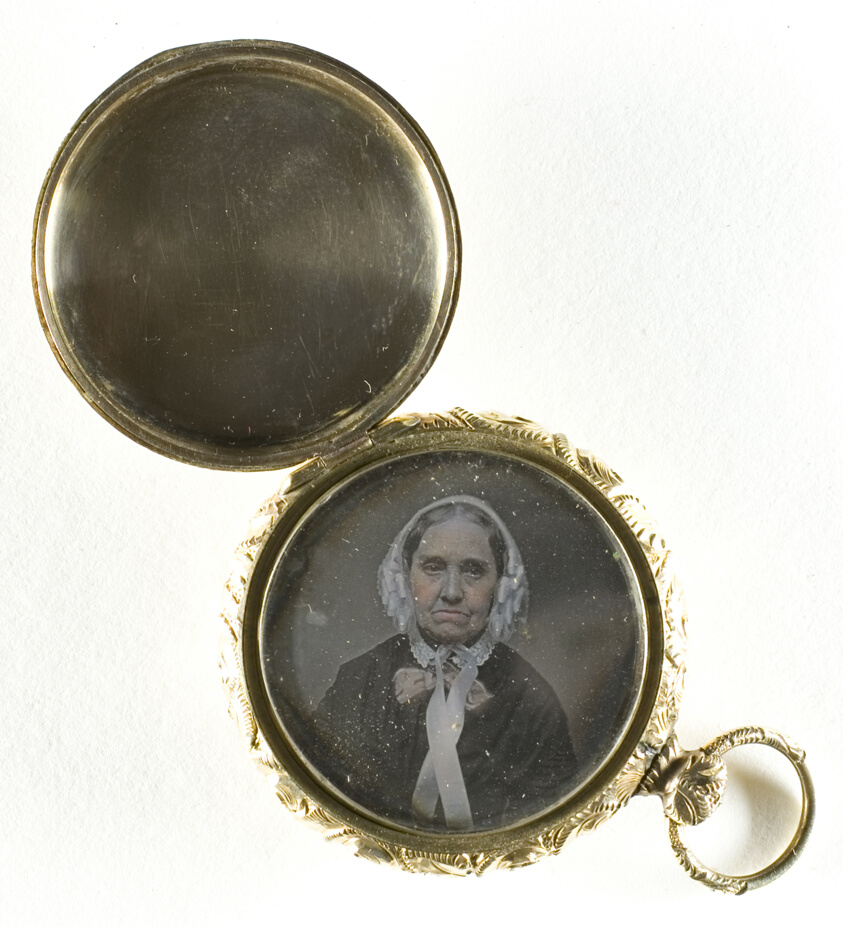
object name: Photograph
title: Untitled (Locket)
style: 19th century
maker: Artist unknown; 19th century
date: 1839/60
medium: Daguerreotype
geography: Unknown Place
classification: daguerreotype; photographic process; photography; photograph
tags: portraits, portraits: male subject, photography, portraits: female subject